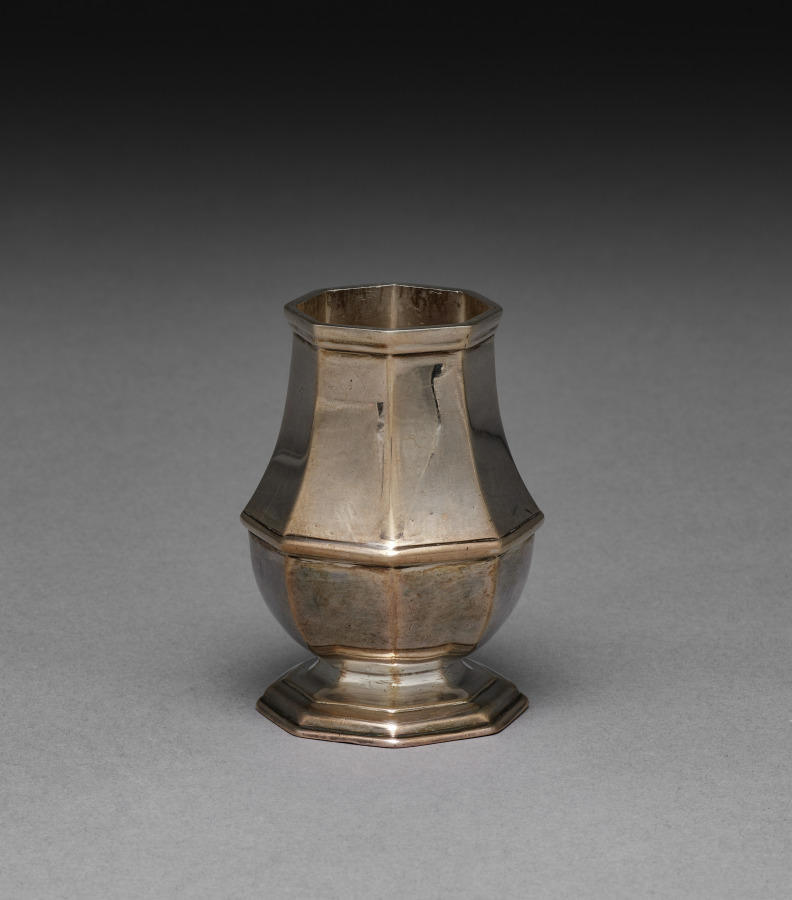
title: Caster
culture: England, London, 18th century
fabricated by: William Spackman (British)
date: 1719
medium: silver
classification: Silver